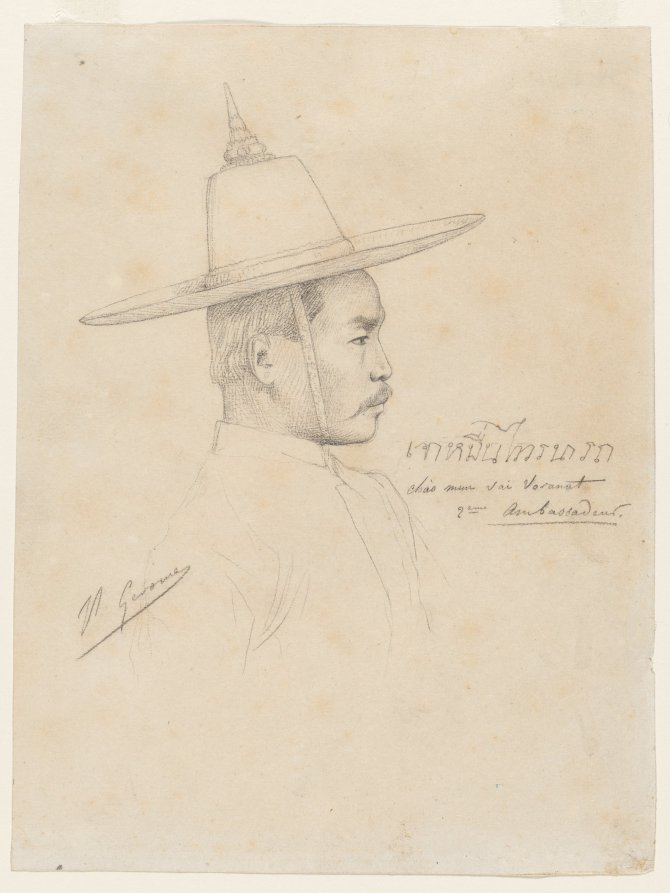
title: Study for "The Reception of the Siamese Ambassadors at Fontainebleau"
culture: France, 19th century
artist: Jean-Léon Gérôme (French, 1824–1904)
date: 1861–1864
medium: black chalk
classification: Drawing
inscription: Signed in graphite, lower left: J. L. Gérôme; Inscribed, in graphite, right center: [a line of Vietnamese characters] / Chao mun sai Voranat / 2eme Ambassadeur